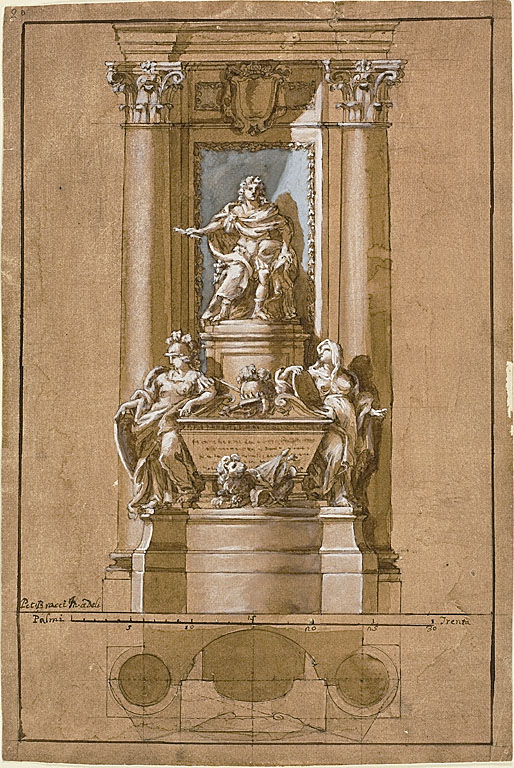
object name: Drawing and Watercolor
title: Project for the Tomb of James III, the Old Pretender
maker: Pietro Bracci (Italian, 1700-1773)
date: c. 1766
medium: Pen and brown ink, and brush and brown wash, with white and blue gouache, over graphite, on cream laid paper, prepared with a brown wash ground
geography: Italy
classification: ink or chalk wash; drawings (visual works); prints and drawing